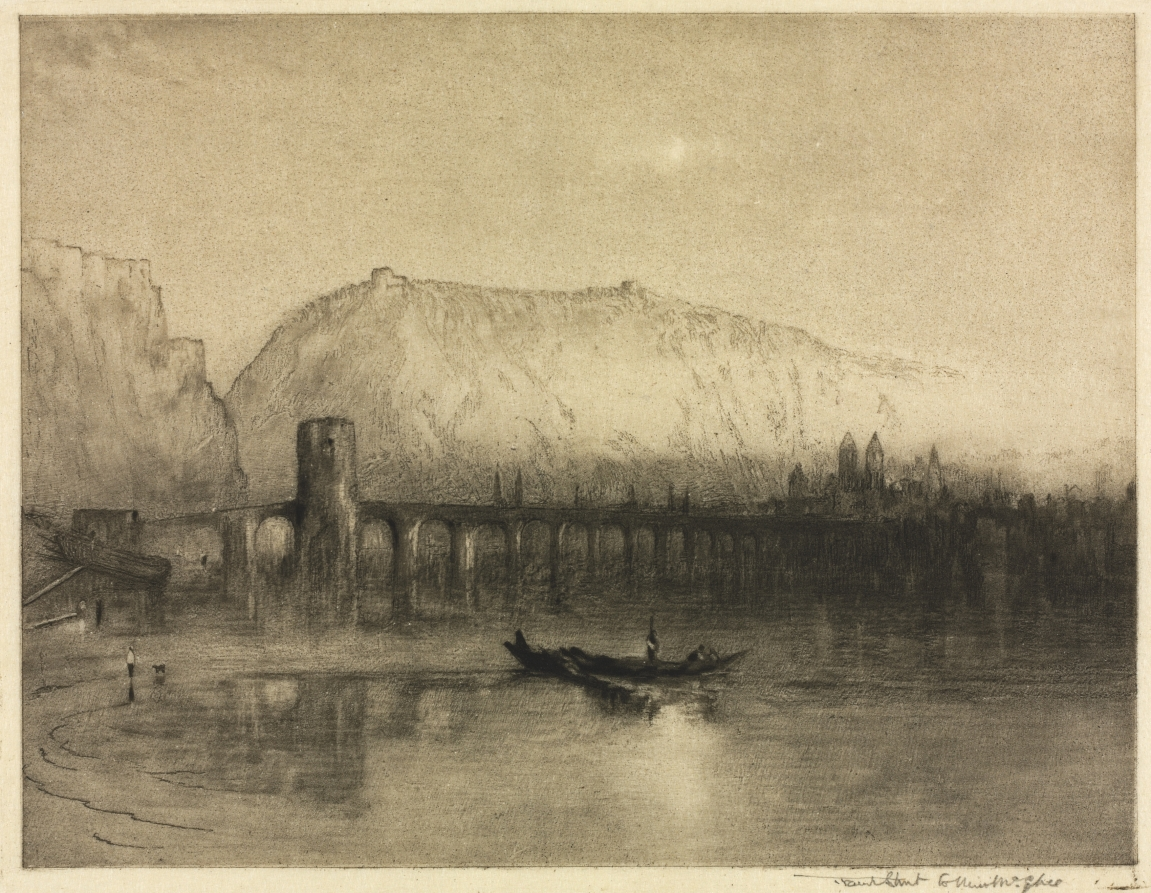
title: Ehrenbreitstein to Coblenz, No. 1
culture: England, 19th century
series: published in "The Portfolio" vol. XXII, 1891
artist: Frank Short (British, 1857–1945)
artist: after Joseph Mallord William Turner (British, 1775–1851)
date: 1891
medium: softground etching and aquatint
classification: Print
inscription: Lower right, in pencil, signed by the artist and his printer: "Frank Short Goulding" Bottom left, in pencil: "trial proof before alteration in sky" Bottom right, in pencil: "A292"